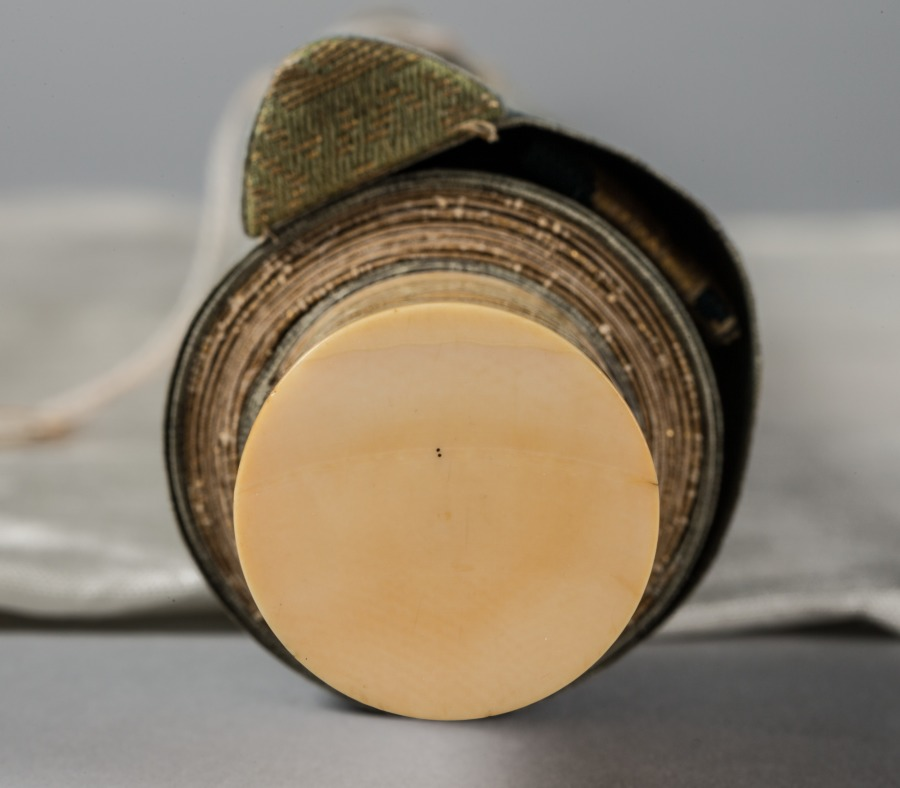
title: Female Daoist Figure in Landscape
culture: Japan, Muromachi period (1392–1573)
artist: Kōboku (Japanese)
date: early 1500s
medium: hanging scroll; ink on paper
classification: Painting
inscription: 「興牧」（朱文方印）